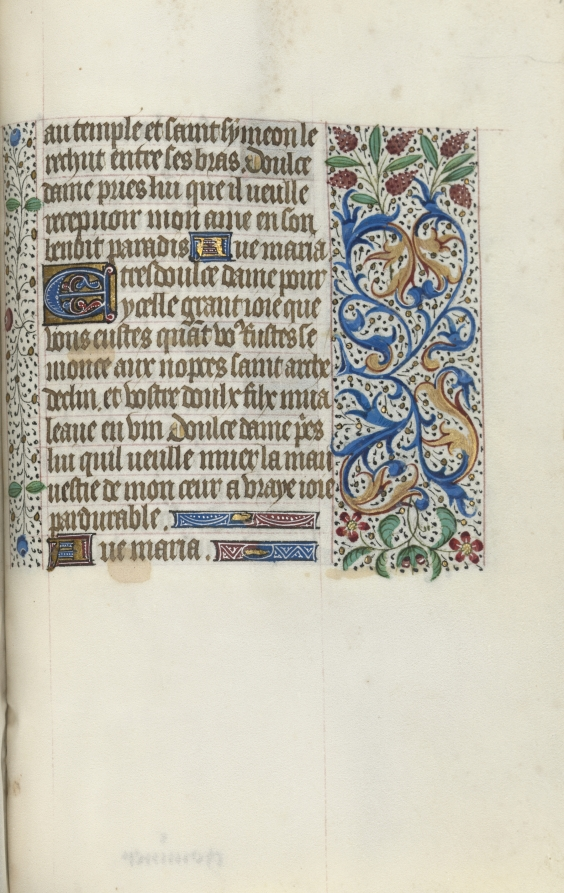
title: Book of Hours (Use of Rouen): fol. 149r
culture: France, Rouen, 15th century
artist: Master of the Geneva Latini (French, active Rouen, 1460–80)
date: c. 1470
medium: ink, tempera, and gold on vellum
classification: Bound Volume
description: In the late 1400s and early 1500s Rouen was an established and important center of book production. The city’s cathedral had a wealthy chapter that spent large sums of money to commission books and to maintain its extensive library. The stationers and booksellers would have likely been concentrated in or near the cathedral precinct. This artist, named after a manuscript now in Geneva, was Rouen’s principal illuminator during the second half of the 1400s.